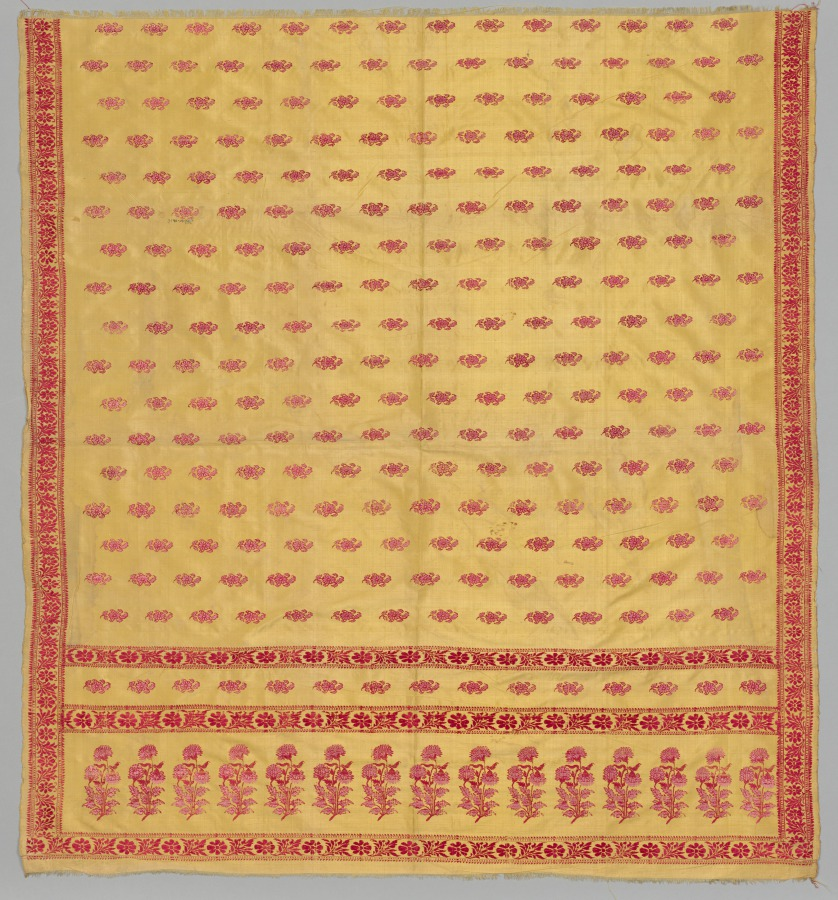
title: Part of a Sari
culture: India, Surat, 19th - 20th century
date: 1800s - early 1900s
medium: brocade, silk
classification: Textile